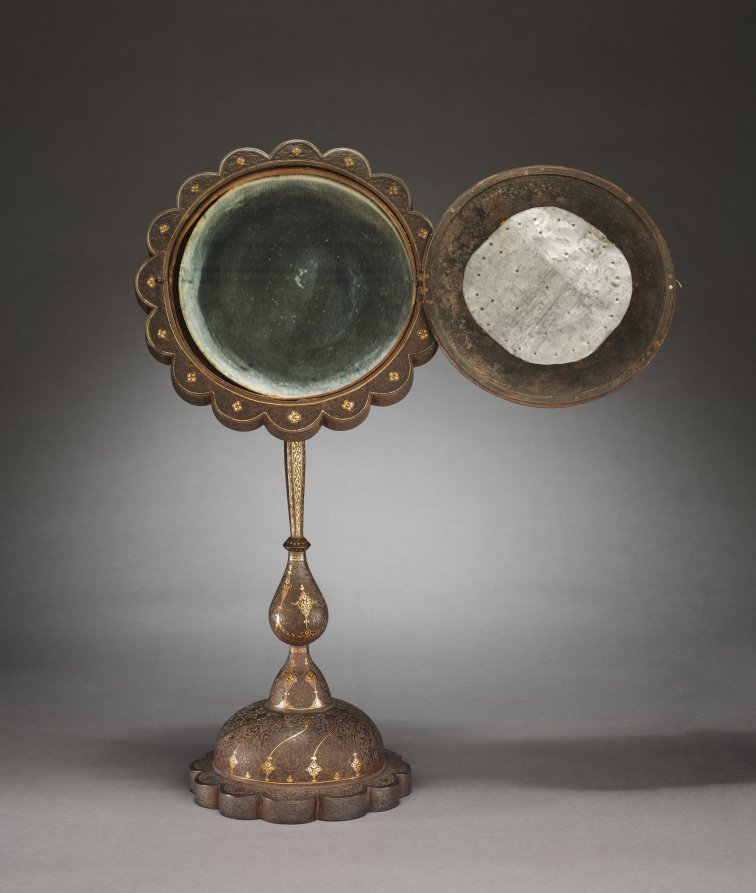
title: Mirror Stand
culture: Iran, Qajar period (1779-1925)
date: 1800s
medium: Steel engraved and inlaid with gold and silver with openwork calligraphic design on hinged door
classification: Metalwork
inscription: Selection from the inscriptions in the surrounding ring: نه هر که چهره برافروخت دلبری داند. نه هر که آینه سازد سکندری داند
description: The mirror was both a courtly accouterment and a popular poetic device in Persian literature. The central circular panel has a hinge and hook that opens to reveal the mirror. The texts in the ring are verses by different authors referring to mirrors. One says: Have they placed a mirror facing the sun at the door of that tent, Or is it the light rays shining from the forehead? Such mirrors were popular during the Qajar period (1779–1925), but this example evokes the grandeur of the earlier Safavid period by inscribing in the center the name of Shah Sulayman (1648–1694) who, fittingly, spent most of his 28-year reign with women in the harem, where such mirrors would have been used.